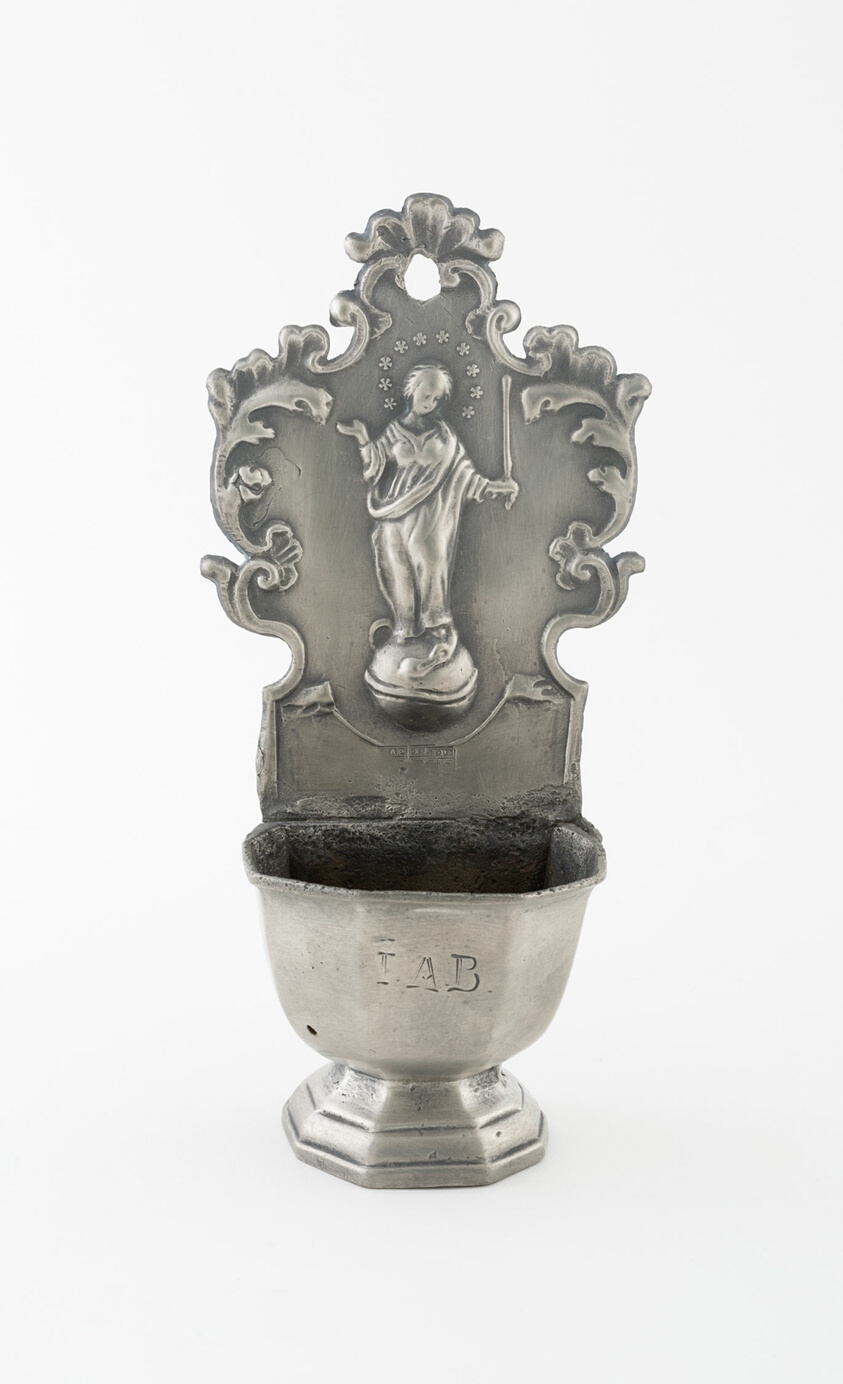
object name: Metalwork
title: Holy Water Stoup (Bénitier)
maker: Possibly Austria-Hungary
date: 18th century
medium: Pewter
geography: Austria-Hungary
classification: pewter; metalwork; european decorative arts